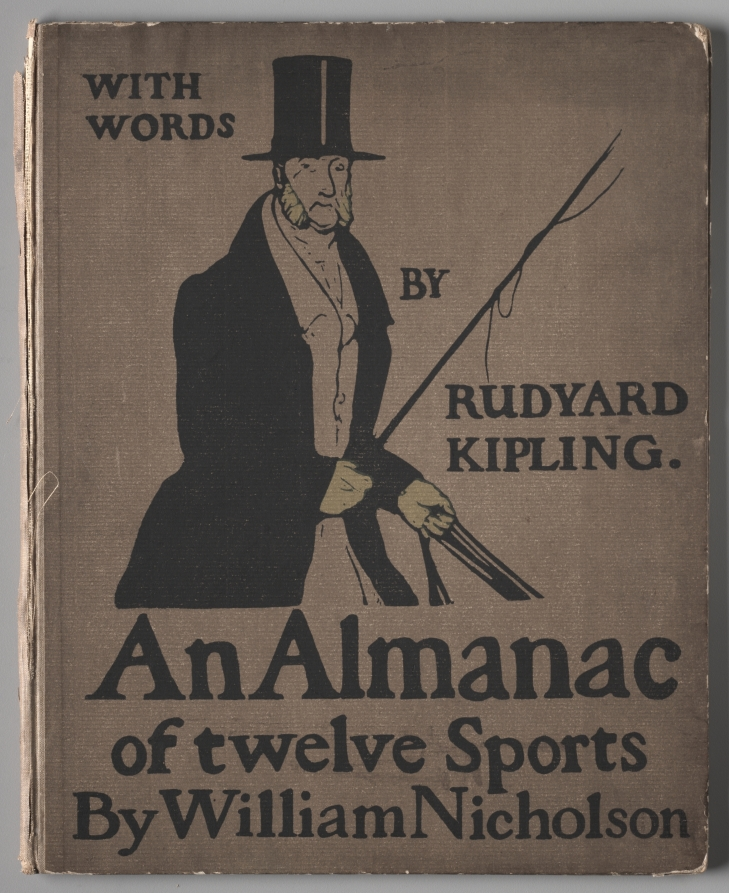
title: "An Almanac of Twelve Sports:" Cover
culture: England, 19th century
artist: William Nicholson (British, 1872–1949)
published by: William Heinemann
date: published November 1897 (post-dated 1898)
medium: color lithograph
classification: Print